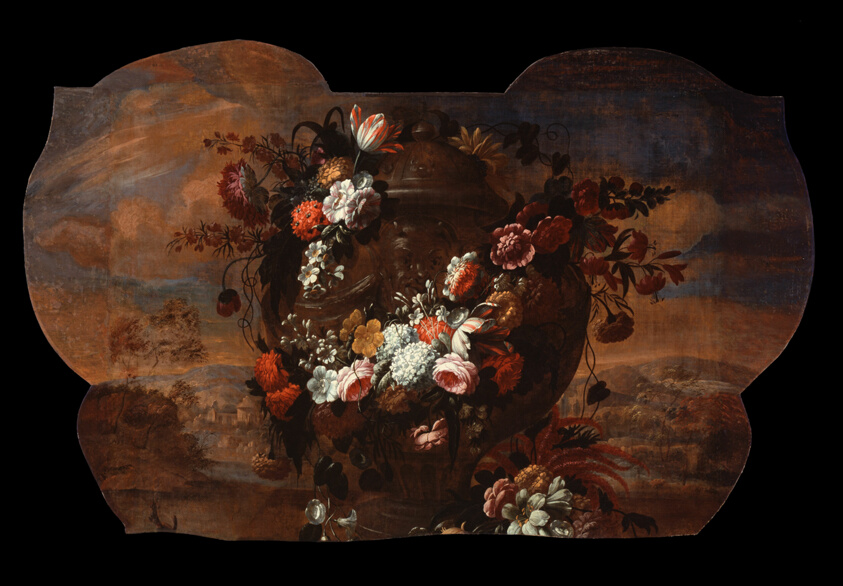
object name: Painting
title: Vase of Flowers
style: 17th Century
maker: Jean Baptiste Belin I (Blin de Fontenay; French, 1653-1715)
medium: Oil on panel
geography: France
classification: painting; french; oil on panel; paint; european painting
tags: flowers, clouds, foliage, landscape, trees, vase